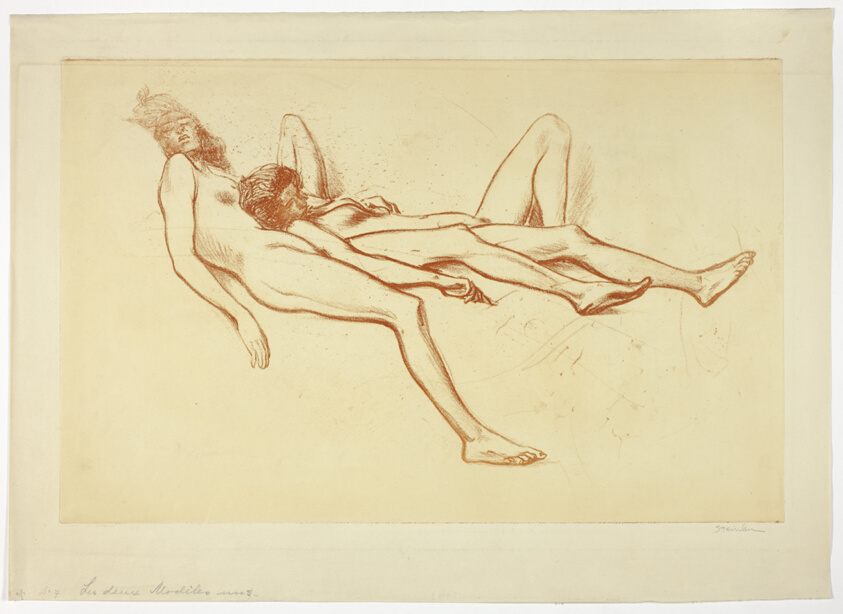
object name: Print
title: Two Nude Models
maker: Théophile-Alexandre Steinlen; French, born Switzerland, 1859-1923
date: 1902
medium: Soft ground etching on paper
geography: France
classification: etching; print; prints and drawing